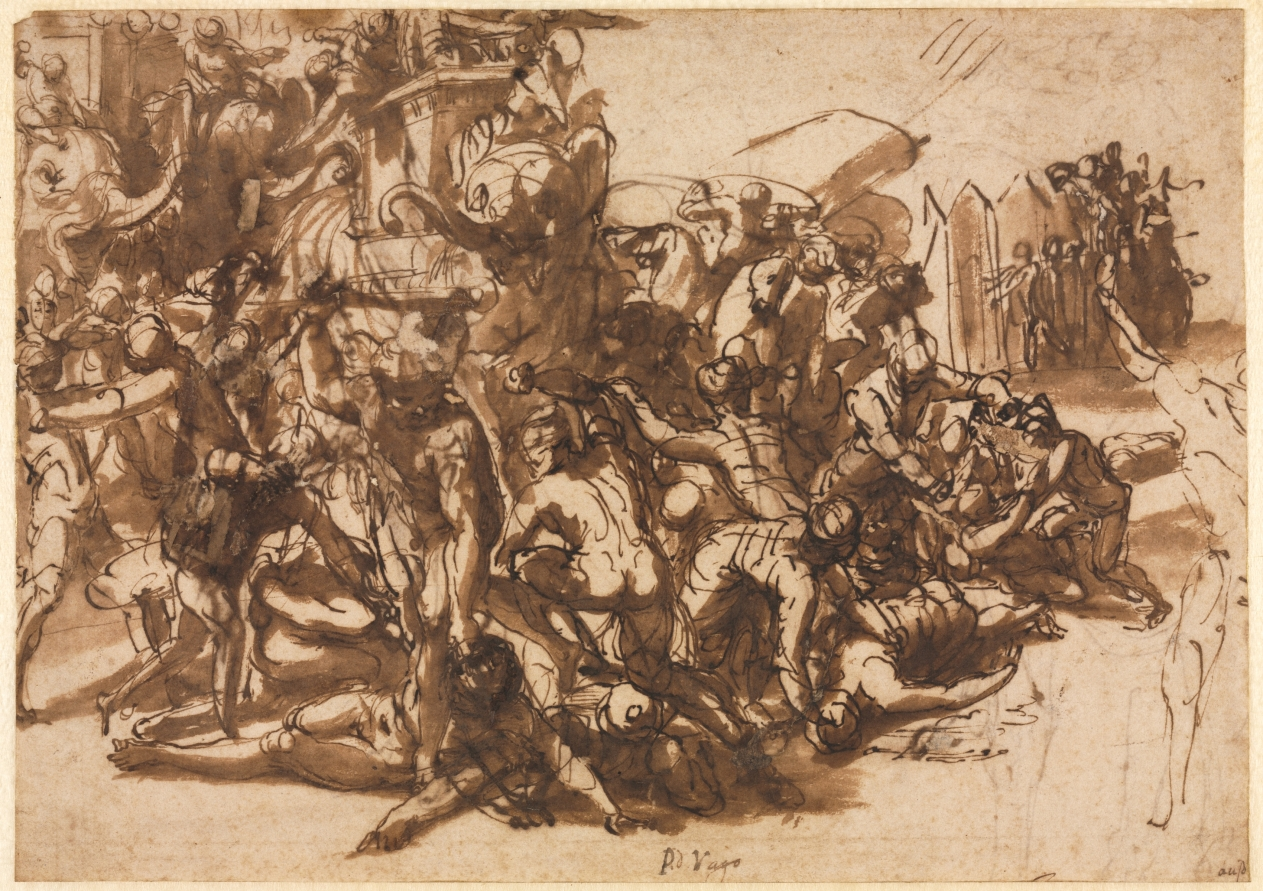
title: Poros Assailed by the Macedonian Army (recto)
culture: Italy, 16th century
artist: Perino del Vaga (Italian, 1501–1547)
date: c. 1545/47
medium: pen and brown ink (iron gall) and brush and brown wash; framing lines in gold paint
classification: Drawing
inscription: lower center, in brown ink: P.d Vago ; lower right, in brown ink: aud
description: Perino del Vaga made this spirited pen and ink and wash drawing as a preliminary sketch for a fresco cycle depicting the military campaigns of Alexander the Great, intended for the apartments of Pope Paul III in the Castel Sant’Angelo in Rome. At the time, he was also working on commissions at the Vatican Palace where he studied and drew from the frescoes of Michelangelo in the Sistine Chapel. One pose in the drawing, that of the man in front who, sword poised over his head, prepares to strike a man below, was probably inspired by Michelangelo’s rendering of David and Goliath on the ceiling. Perino adapted the violent pose for a military rather than biblical subject, filling out the scene with trumpeting elephants and a pile of soldiers in combat. On the verso of the sheet, Perino drew a quick sketch of a standing camel and another, closer view of the animal's head and legs.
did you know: This artist was in Rome in 1527 when the troops of Charles V sacked the city, and was imprisoned and forced to pay a heavy ransom for his, his wife's, and his daughter's safe release.